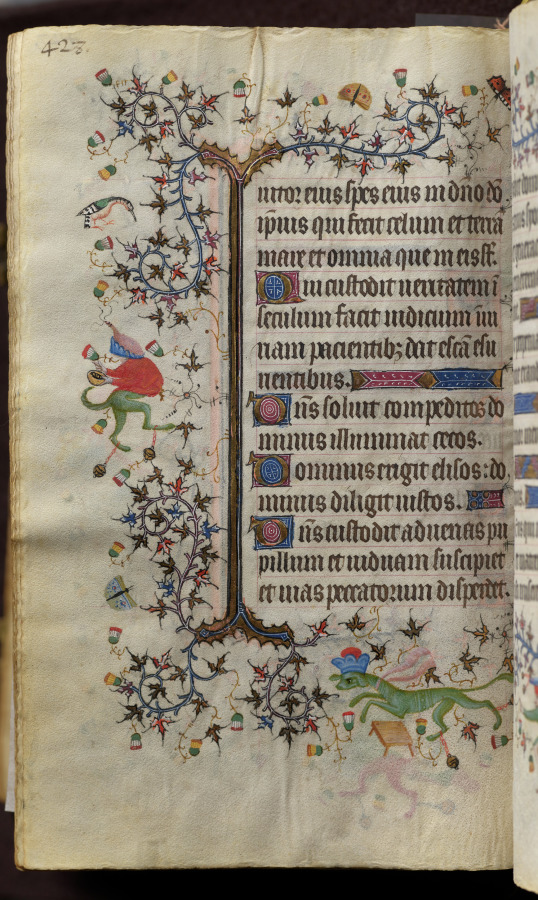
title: Hours of Charles the Noble, King of Navarre (1361-1425): fol. 208v, Text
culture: France, Paris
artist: Master of the Brussels Initials and Associates (French)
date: c. 1405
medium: ink, tempera, and gold on vellum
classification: Bound Volume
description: This precious volume was obviously highly prized by its owner, the French-born King of Navarre, who had his coat of arms painted on no less than twenty folios. Rather than directly commissioning this manuscript from a specific workshop, it seems that Charles the Noble acquired his book of hours -- perhaps ready-made for the luxury market -- while on a trip to Paris in 1404-05. A collaborative effort, six painting styles are evidenced within the pages of this codex, those of two Italians, two Frenchmen, and two Netherlanders. The painter who was responsible for the planning and decoration of the book, and who produced seventeen of the large miniatures, was a Bolognese artist known as the Master of the Brussels Initials. His principal assistant, responsible for most of the borders, was a Florentine who signed his name "Zecho" da Firenze on folio 208 verso.